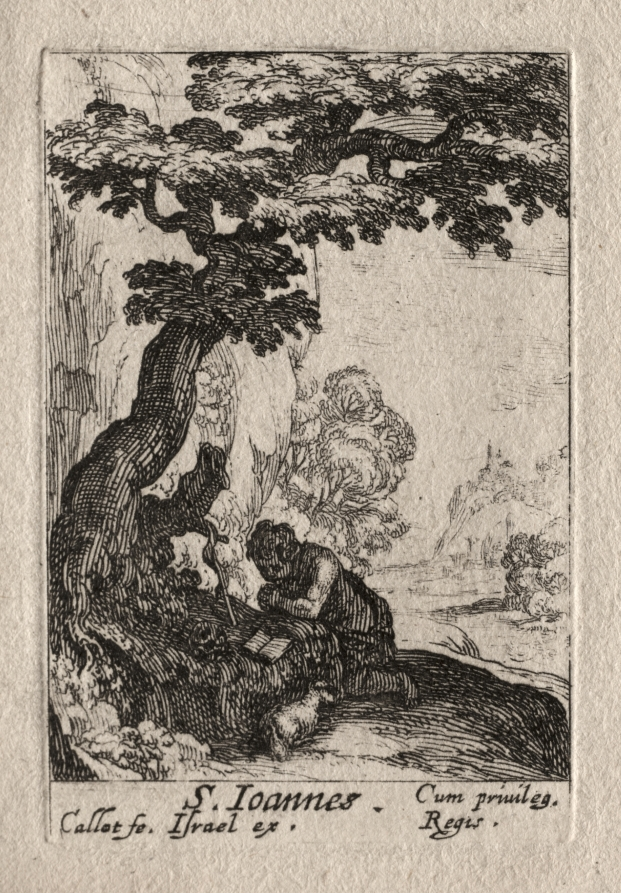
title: Les Penitents: St. Jean Baptiste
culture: France, 17th century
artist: Jacques Callot (French, 1592–1635)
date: ca. 1632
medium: etching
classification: Print